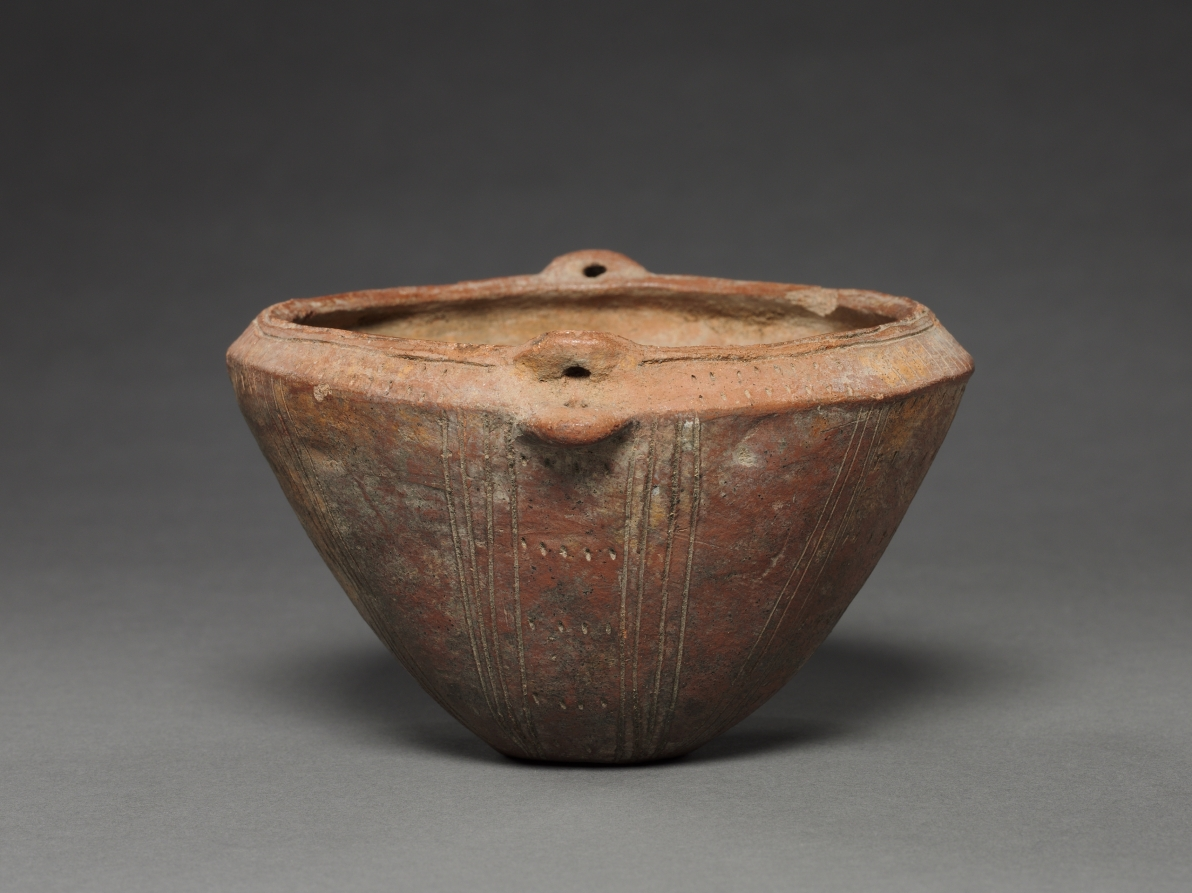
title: Dish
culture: Colombia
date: before 1550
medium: red ware with incised patterns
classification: Ceramic